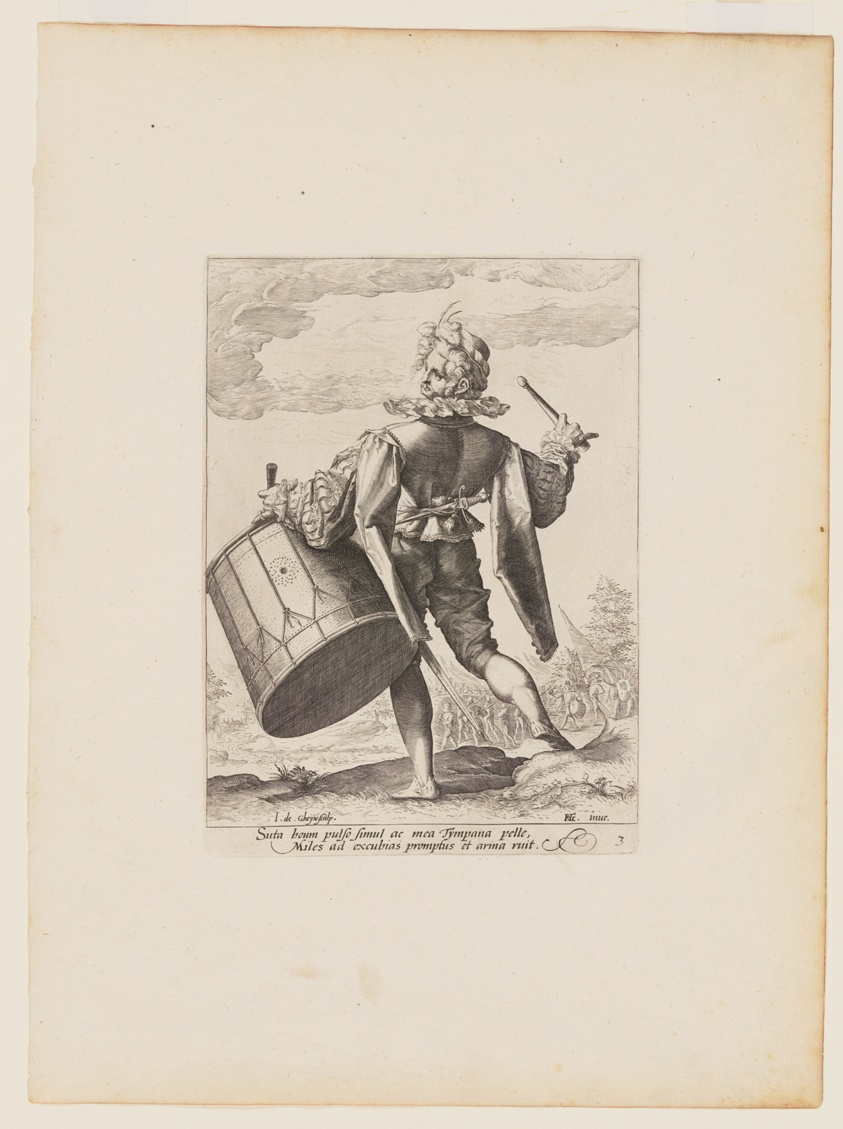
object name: Print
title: Drummer, from Officers and Soldiers of the Bodyguard of Emperor Rudolph II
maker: Jacques de Gheyn II (Dutch, 1565–1629); after Hendrick Goltzius (Dutch, 1558–1617)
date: 1587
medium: Engraving on ivory laid paper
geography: Netherlands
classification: engraving; paper; print; prints and drawing